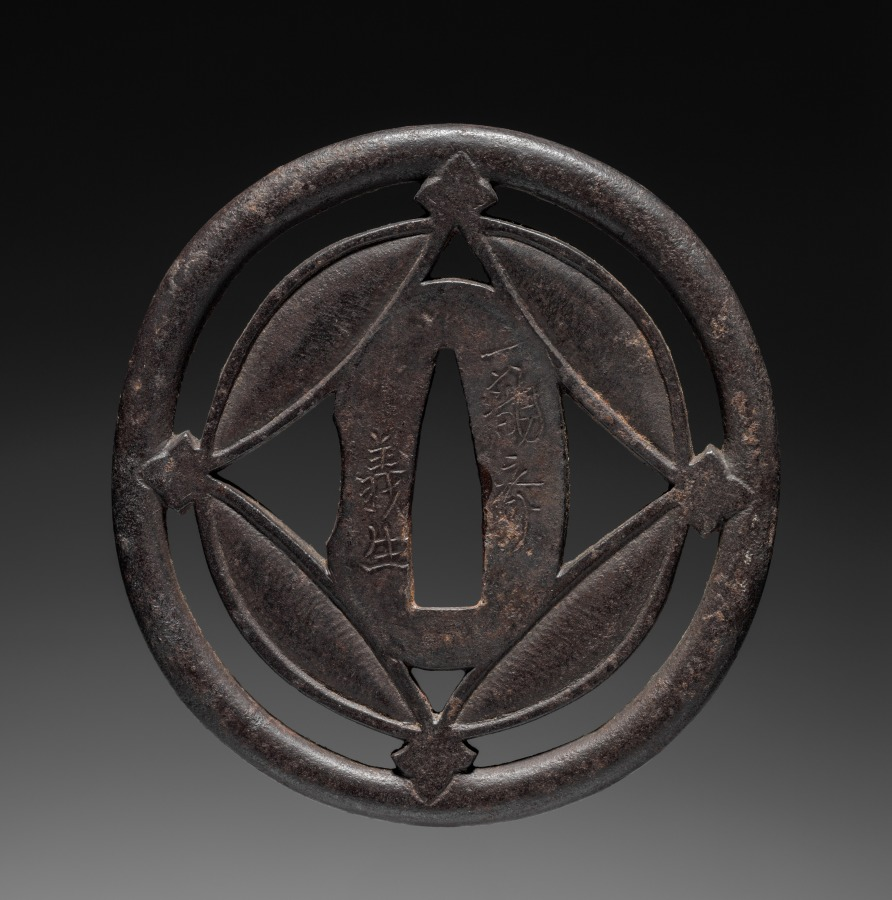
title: Sword Guard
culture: Japan, Edo period (1615–1868)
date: late 1700s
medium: iron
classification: Arms and Armor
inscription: Signnature: Ichiryusai Yoshinari